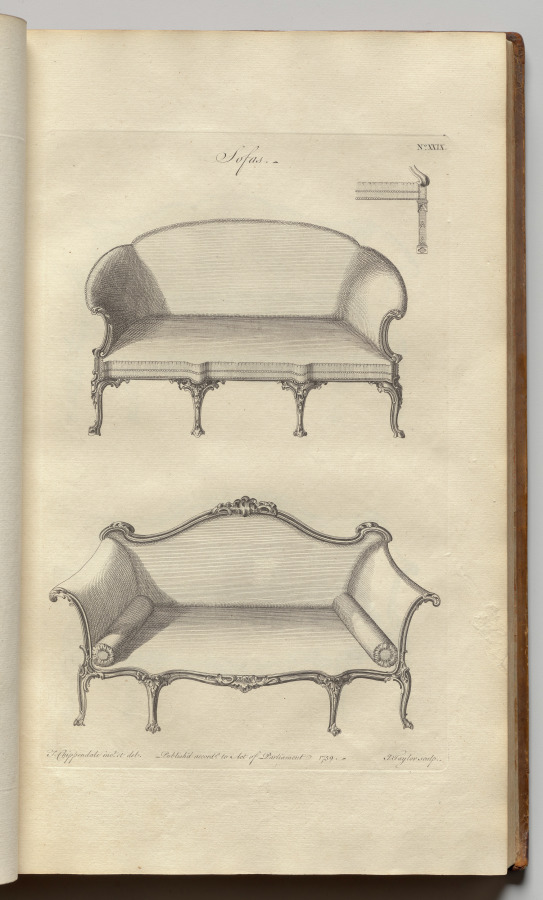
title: The Gentleman and Cabinet-Maker's Director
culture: Britain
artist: Thomas Chippendale (British, 1718–1779)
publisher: T. Becket & P. A. de Hondt (British)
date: 1762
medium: Paper, leather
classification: Bound Volume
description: Through his designs for furniture and architectural elements, Thomas Chippendale became one of the most influential tastemakers of the 1700s. He published three editions of The Gentleman and Cabinet-Maker’s Director (1754, 1755, and 1762), which sold widely in Britain, Ireland, and America. This rare French version of the third edition demonstrates his effort to spread his designs for both naturalistic and neoclassical decoration even wider across Europe.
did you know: Fewer than fifteen copies, including this one, of the French edition of Thomas Chippendale’s famous book of designs, are known to exist.